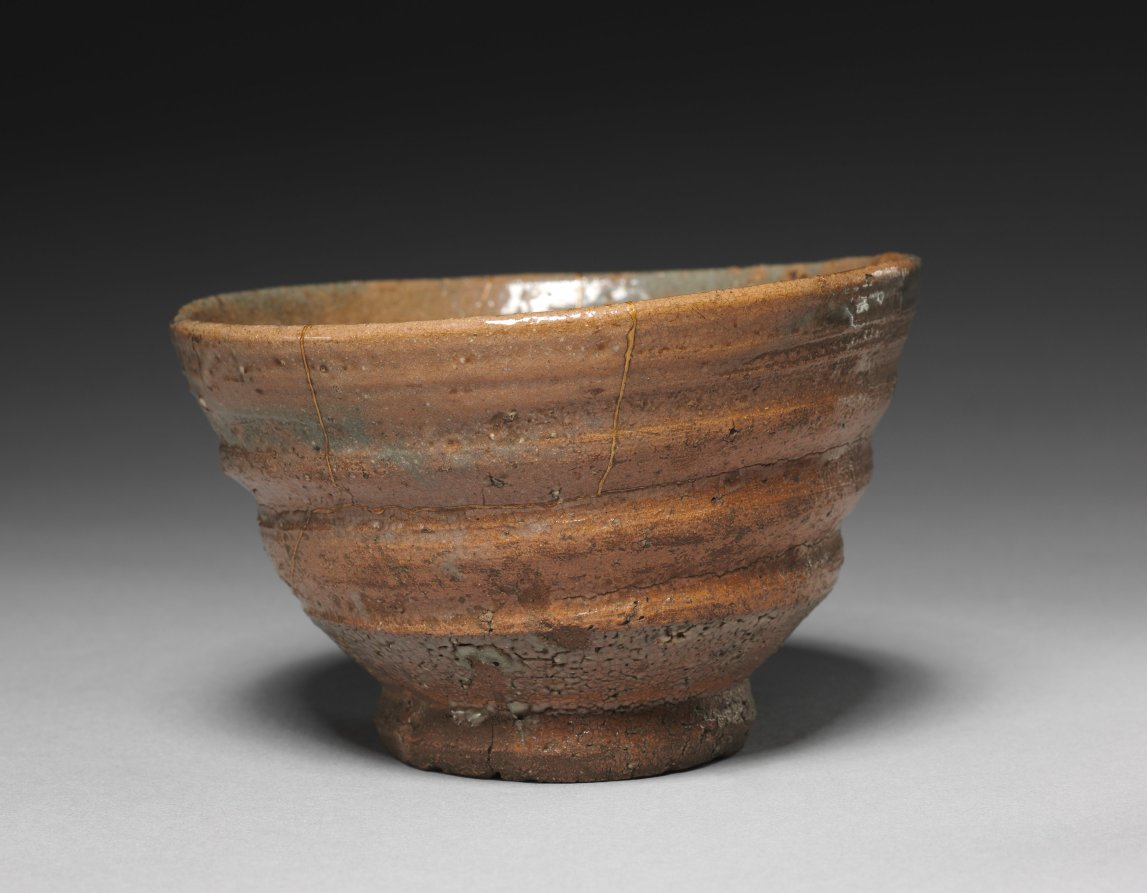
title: Tea Bowl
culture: Korea, Joseon dynasty (1392–1910)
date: 1600s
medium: glazed stoneware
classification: Ceramic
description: This type of wide-mouthed bowl was used every day in Korea, not exclusively for tea drinking. But when it was introduced to Japan around the early 16th century, its imperfect appearance, which evokes the aesthetics of wabi-sabi, caused it to be repurposed as a tea bowl. Korean tea bowls were circulated as a item of foreign luxury among Japanese military elites. This type of tea bowl may have been produced in one of the kilns established and operated by the trading office (Waegwan) in Busan, southern Gyeongsang province, as an export item for Japanese tea bowl collectors.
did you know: For its imperfect aesthetics, this type of rustic tea bowl was highly appreciated among advanced Japanese practitioners of the tea ceremony.